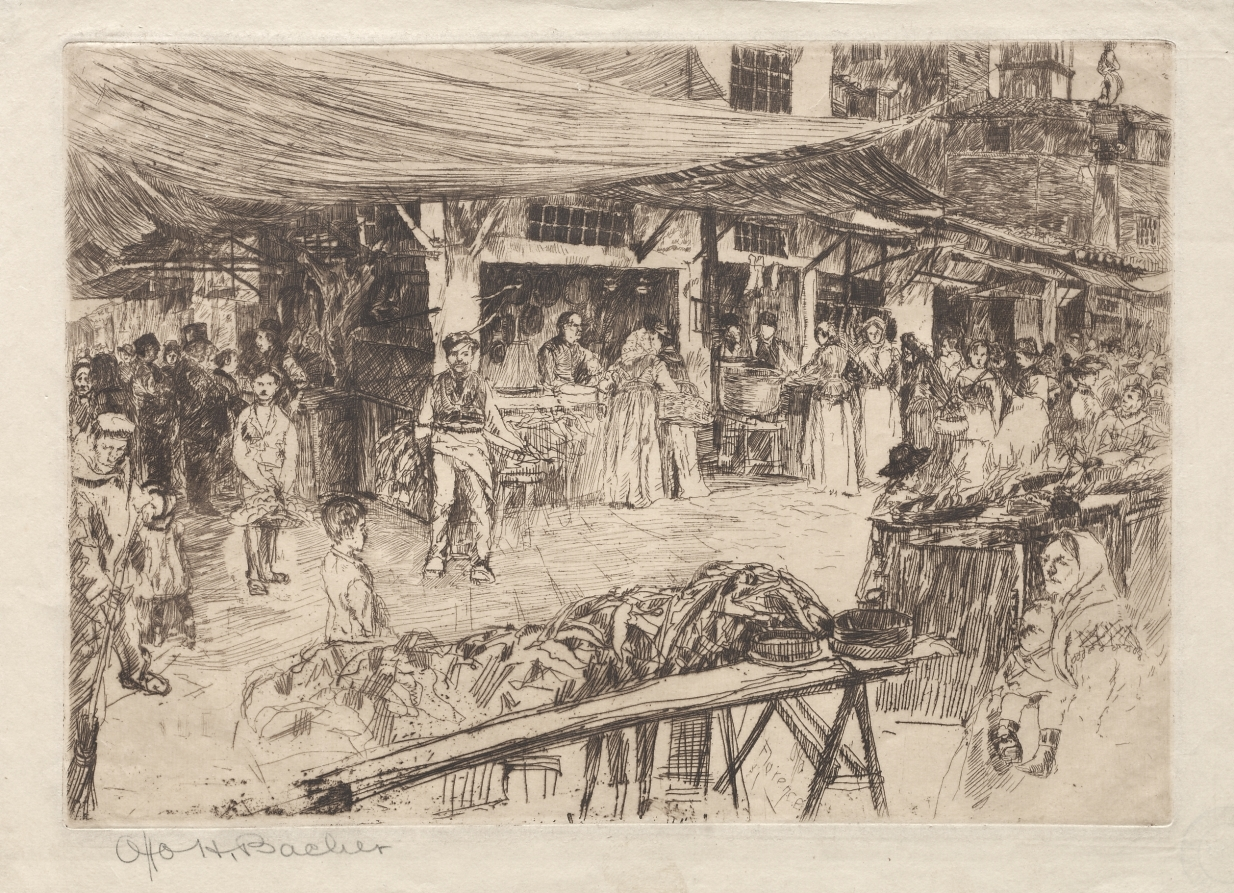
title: Old Market, Florence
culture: America, late 19th-early 20th Century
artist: Otto H. Bacher (American, 1856–1909)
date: 19th-20th century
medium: etching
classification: Print